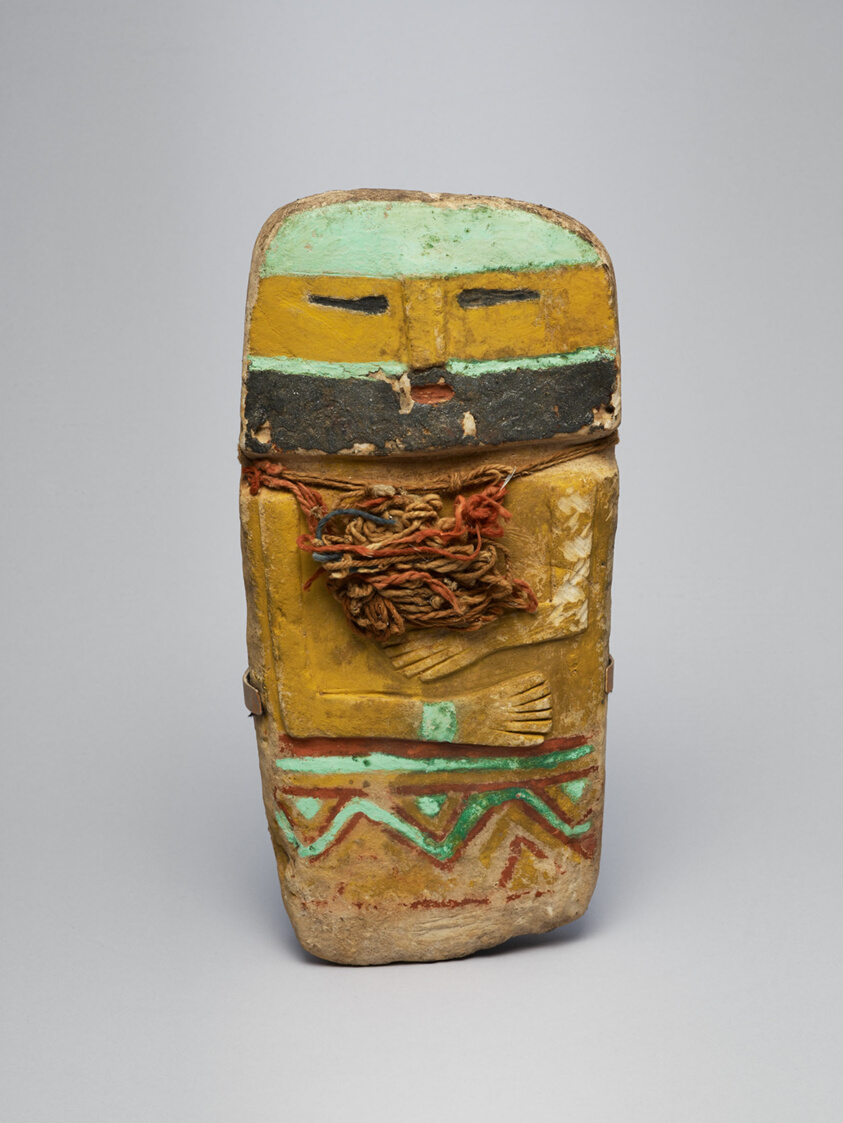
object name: Religious/Ritual Object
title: Ritual Cache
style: salado, mimbres, mogollon, americas, southwest, native american, native north american, Arts of the Americas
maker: Salado branch of the Mogollon; New Mexico, United States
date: 1300–1400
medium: Wood, stone, plant fibers, cotton, feathers, hide, and pigment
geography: New Mexico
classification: ceremonial object; ceramics; masks; ritual objects; art of the americas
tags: ceremonial objects, figures (representations), snakes, ritual objects, mountain lions, indigenous, nature, altar, offering, feathers, corn, lightning, fertility, supernatural, basketry, hunting